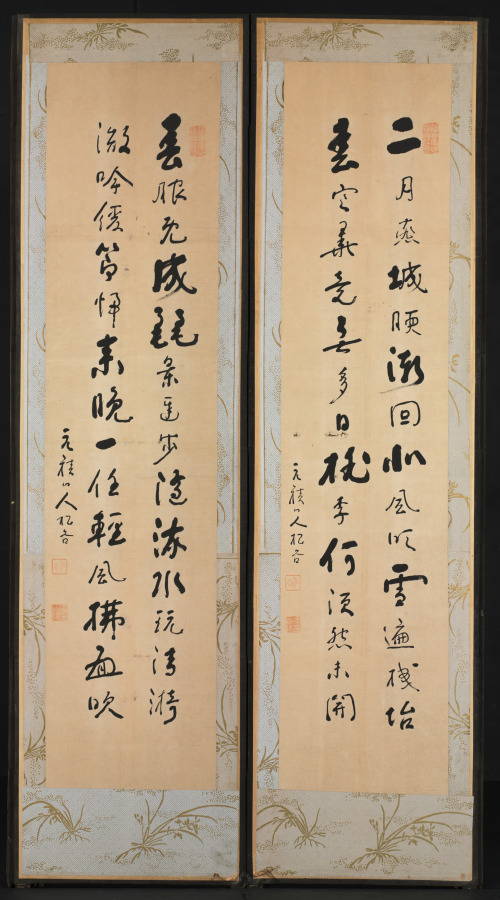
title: Calligraphy (reverse)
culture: Korea, Joseon dynasty (1392–1910)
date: late 1800s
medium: Ten-panel folding screen affixed with album leaves (obverse), calligraphy (reverse), ink and color on silk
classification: Painting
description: The front of this screen features an assortment of subjects: birds and flowers, landscapes, and scenes of everyday life, mostly in monochromatic ink with light colors. The screen’s reverse side conveys a number of classical poems about the fleeting beauty of the four seasons. Traditionally, only one side of a folding screen bears painted or embroidered images, since these were used as a background furnishing. In Korean houses by the 1800s and early 1900s, however, two-sided folding screens became noticeably popular, possibly inspired by Japanese double-sided folding screens, which mainly served as room dividers in Japanese households.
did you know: A calligrapher has brushed several Chinese poems about the four seasons on the reverse side, among them "Composing in the Daytime of Summer" by Tang poet Liu Zongyuan (773–819) and "Composing when Spring Begins" by Song scholar Zhang Shi (1133–1180).